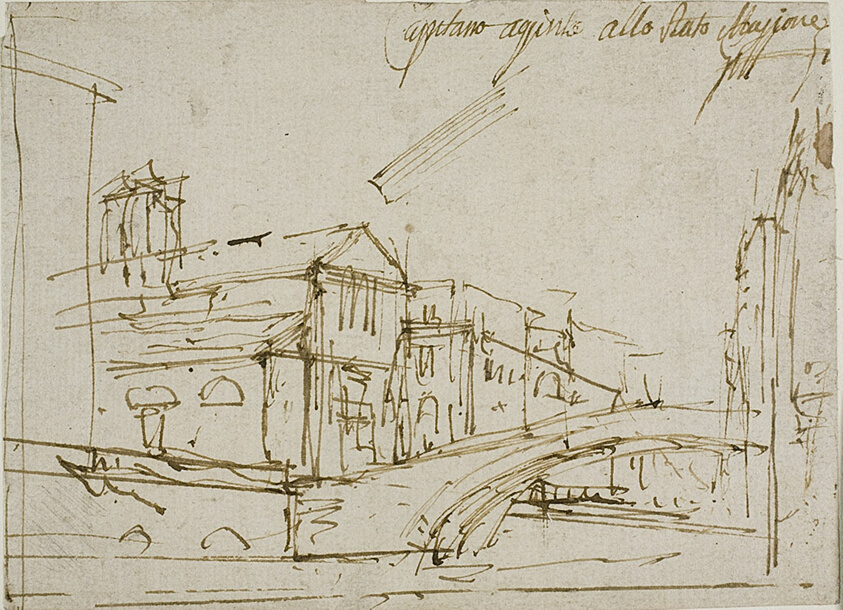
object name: Drawing and Watercolor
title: A Bridge Near a Church in Venice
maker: Canaletto (Italian, 1697-1768)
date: c. 1720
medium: Pen and brown ink, on ivory laid paper, (black chalk and pen and brown ink sketch on verso), perimeter mounted on cream card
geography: Italy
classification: pen and ink drawings; drawings (visual works); prints and drawing